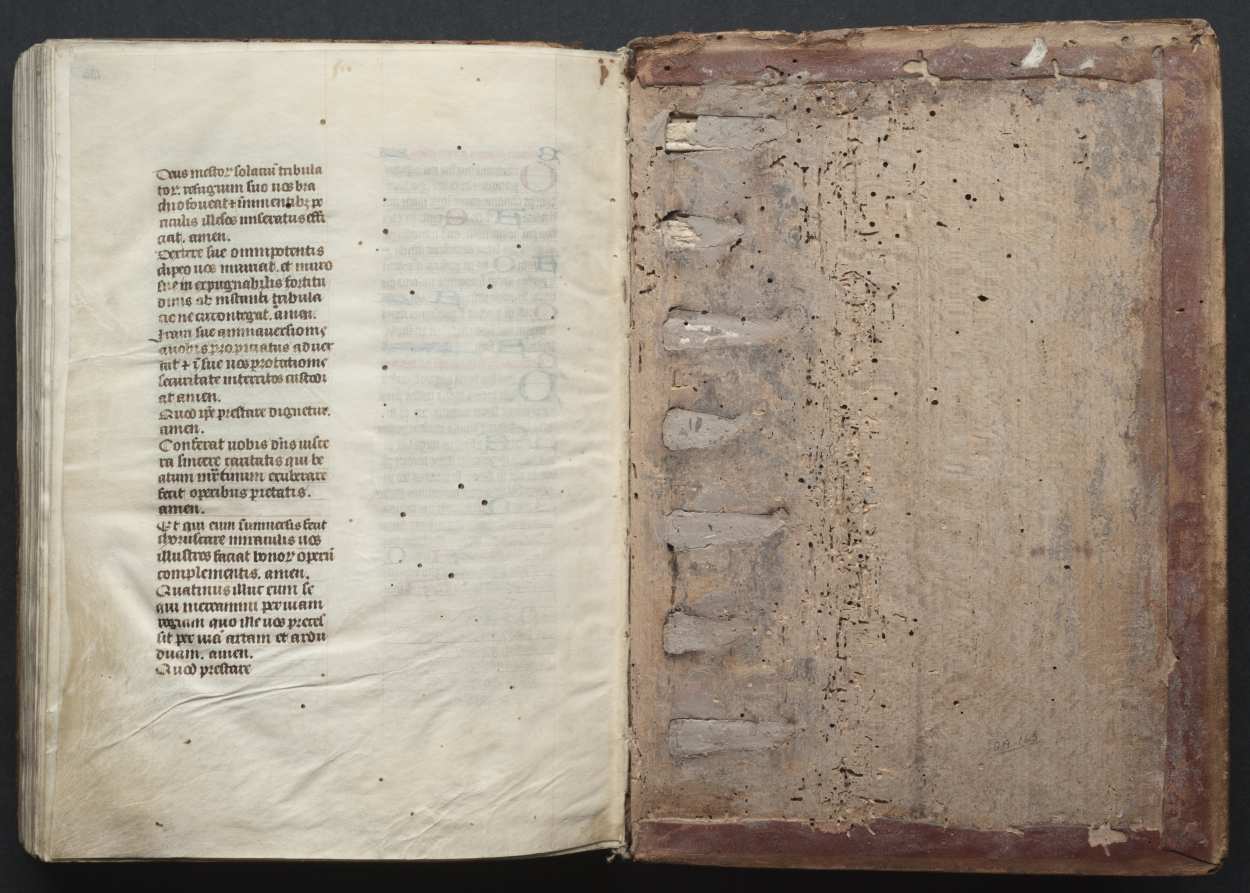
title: The Gotha Missal: Fol. 164v, Text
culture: France, Paris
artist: Master of the Boqueteaux (French)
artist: and Workshop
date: c. 1375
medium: ink, tempera, and gold on vellum; blind-tooled leather binding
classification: Bound Volume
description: The style and quality of this manuscript's decoration is typical of deluxe Parisian books made for aristocratic or royal patrons. Most of the book's decoration appears to be the work of the Master of the Boqueteaux, an artist active at the court of King Charles V (died 1380). His style was apparently shared by a number of book illuminators working in and around Paris. It is very possible that the Gotha Missal belonged to Charles V, but is not provable because the manuscript has no royal portraits and lacks a colophon. Given the book's magnificent decoration, however, it would seem that it was produced for a Valois prince, if not for the king himself. The manuscript receives its name from the German dukes of Gotha, its later owners.